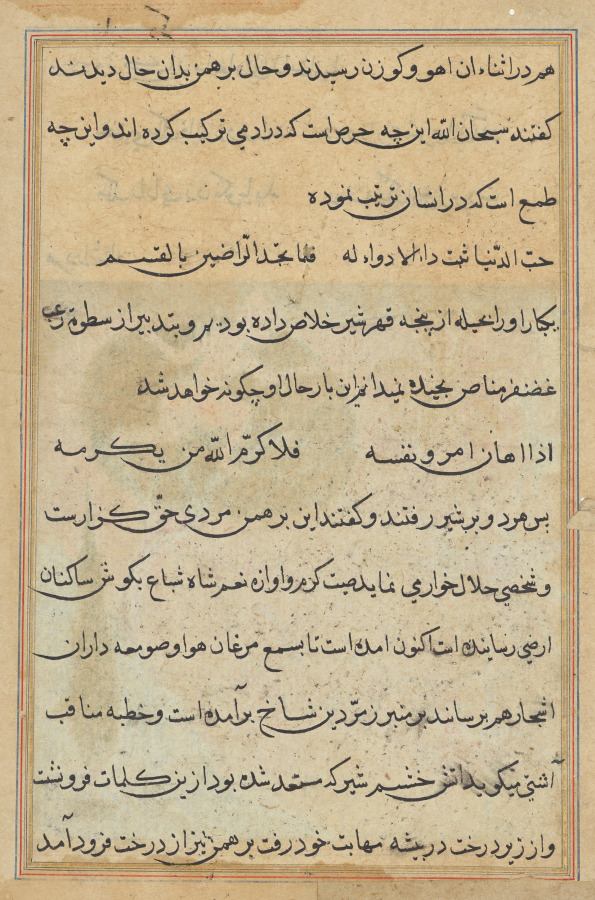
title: Page from Tales of a Parrot (Tuti-nama): text page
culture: Mughal India, court of Akbar (reigned 1556–1605)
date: c. 1560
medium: gum tempera, ink, and gold on paper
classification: Painting